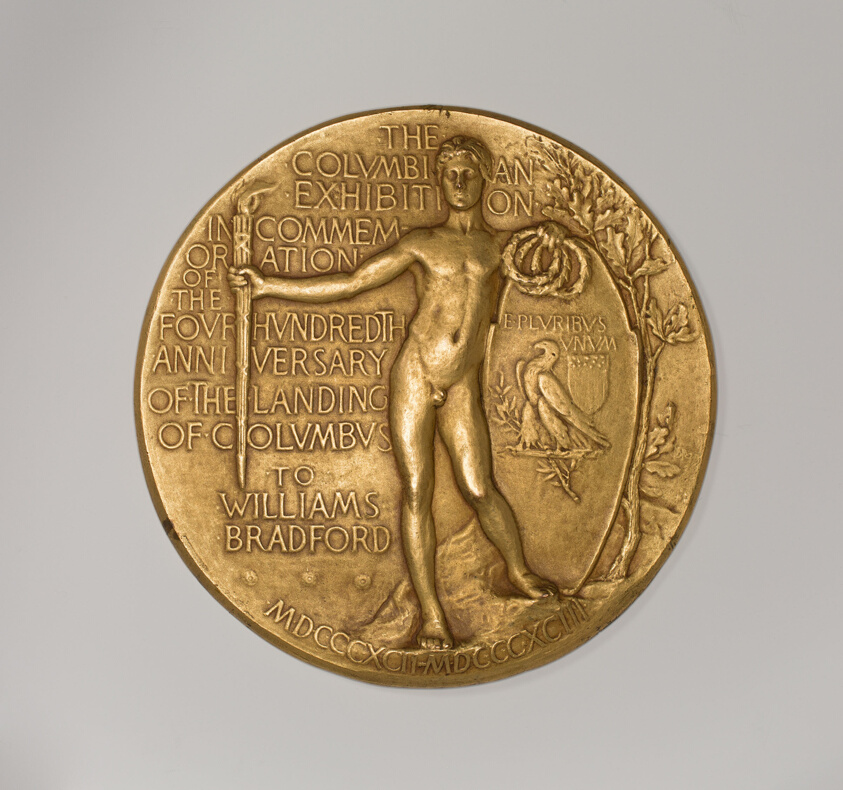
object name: Metalwork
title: World's Columbian Exposition Commemorative Presentation Medal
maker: Louis Saint-Gaudens (American, 1854–1913)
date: 1892–94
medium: Bronze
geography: United States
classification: medal; american arts; decorative arts